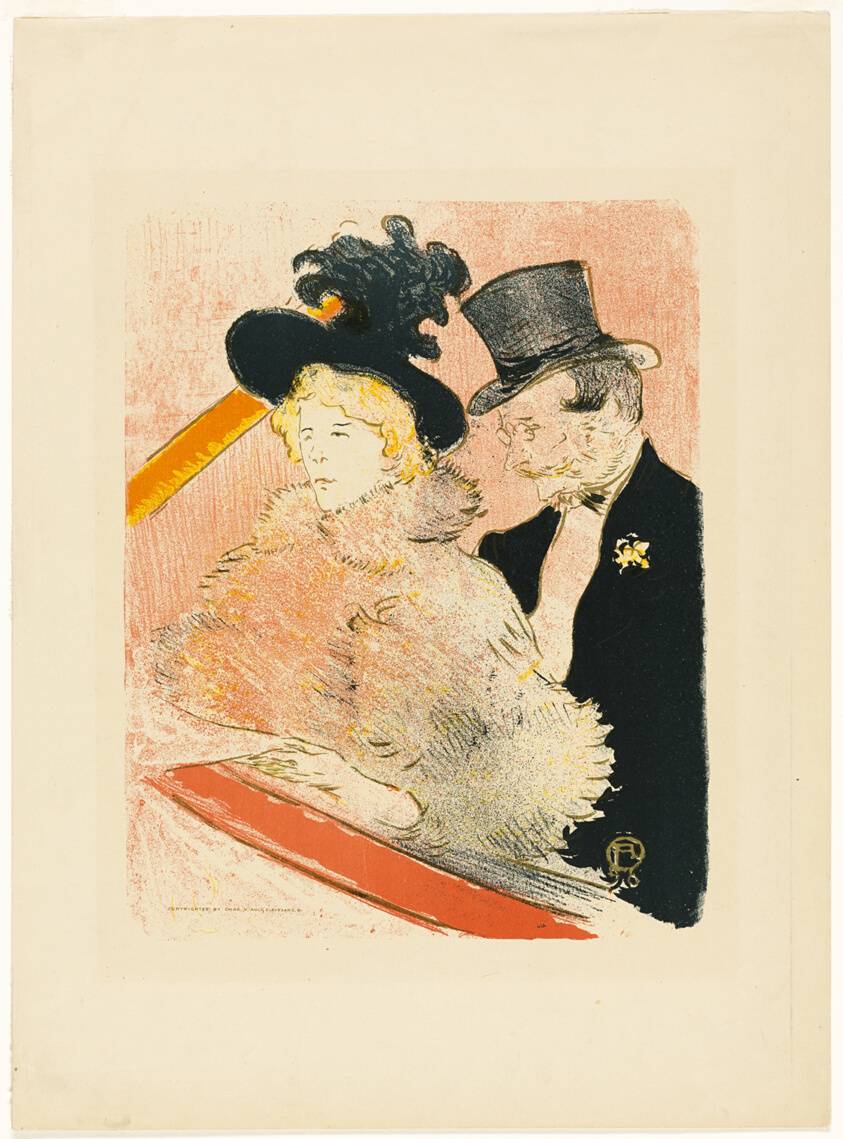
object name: Print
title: At the Concert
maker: Henri de Toulouse-Lautrec (French, 1864-1901)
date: 1896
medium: Color lithograph on cream wove paper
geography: France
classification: zincograph; print; prints and drawing